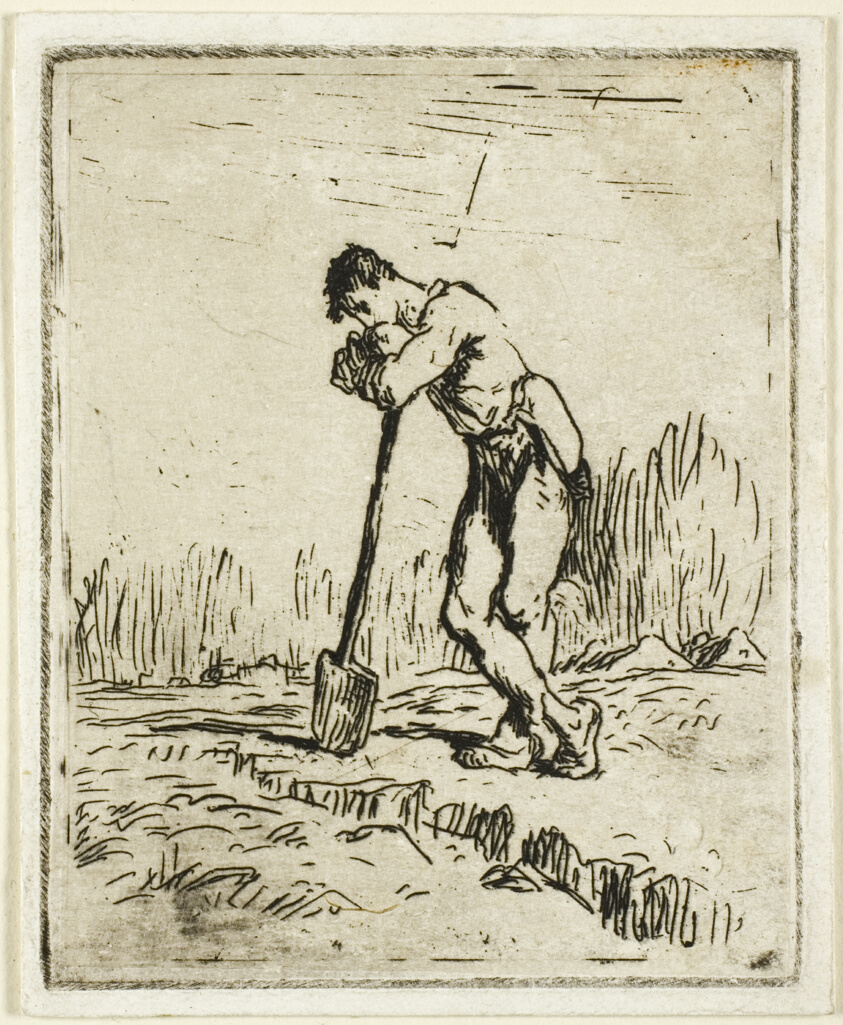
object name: Print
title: The Man Leaning on His Spade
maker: Jean François Millet (French, 1814-1875)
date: c. 1847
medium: Etching on ivory wove card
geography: France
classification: etching; print; prints and drawing